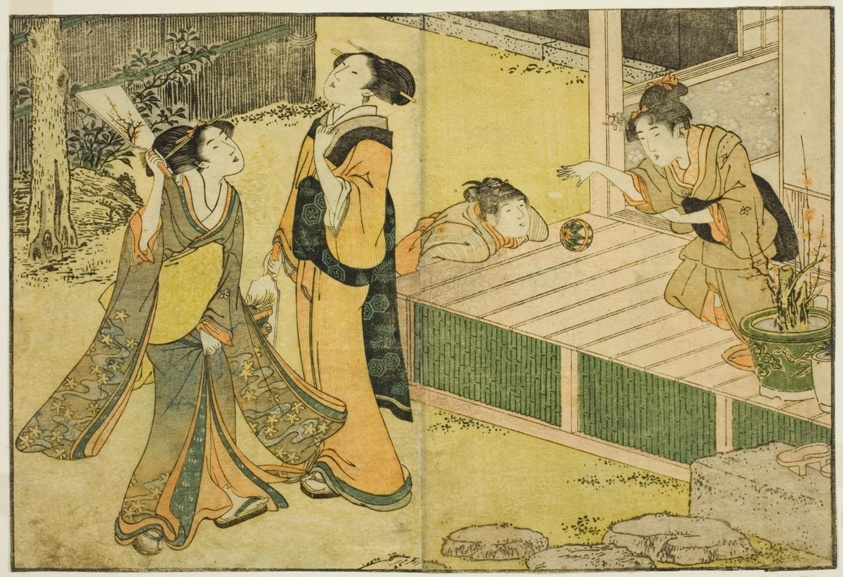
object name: Print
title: New Year Games of Shuttlecock, Battledore, and Hand Ball, from the illustrated book "Picture Book: Flowers of the Four Seasons (Ehon shiki no hana)," vol. 1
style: Japanese (culture or style)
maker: Kitagawa Utamaro 喜多川 歌麿; Japanese, 1753 (?)-1806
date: New Year, 1801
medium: Color woodblock print; double-page illustration from book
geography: Japan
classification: woodblock print; print; asian art